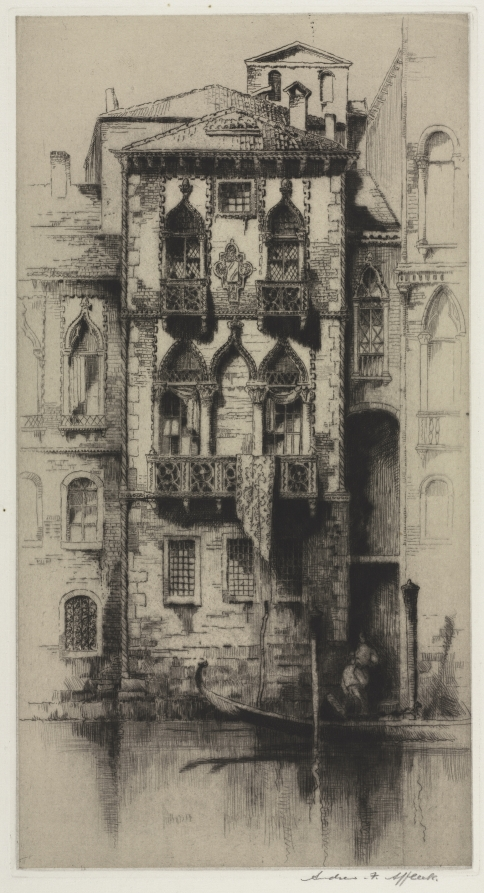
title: Palazzo Contanni, Venice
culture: England, 20th century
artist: Andrew F. Affleck (British, 1874–1935)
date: 1920–1929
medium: etching and drypoint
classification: Print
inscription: lower margin, in graphite: Andrew F. Affleck